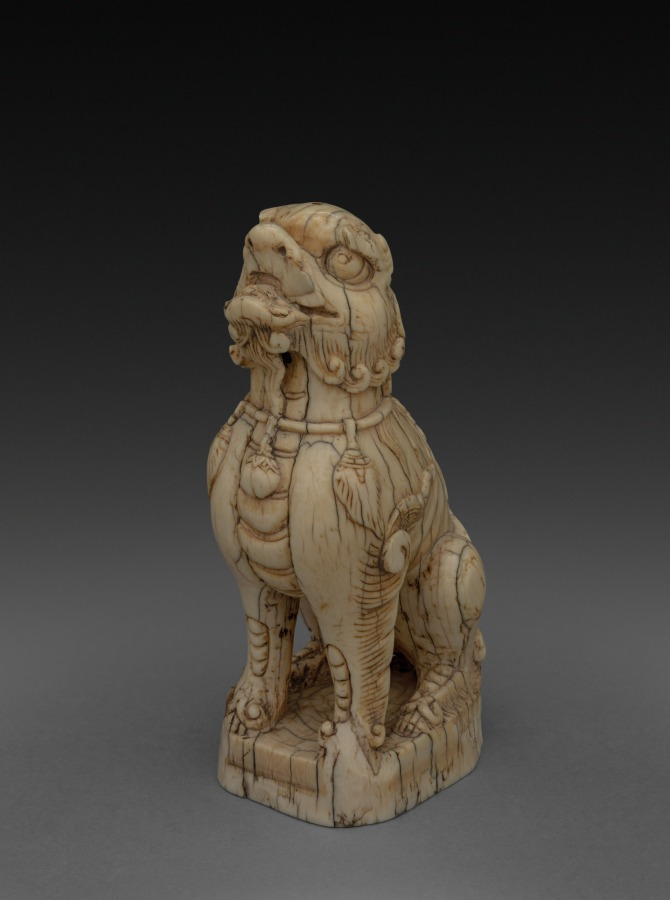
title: Lion Dog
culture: China, Song dynasty (960-1279) - Yuan dynasty (1271-1368)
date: 13th - 14th century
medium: ivory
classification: Ivory